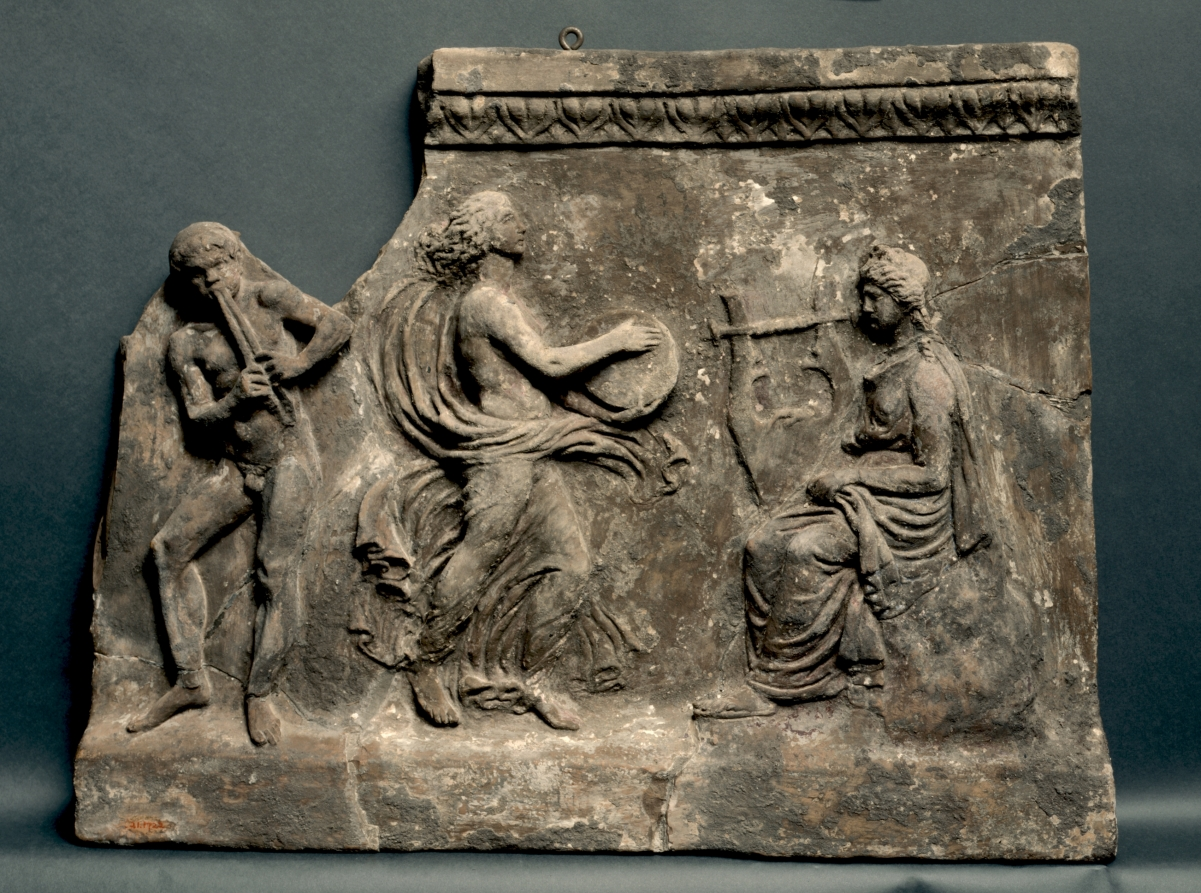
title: Wall Tile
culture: Italy, Roman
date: 1–25 CE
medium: terracotta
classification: Sculpture